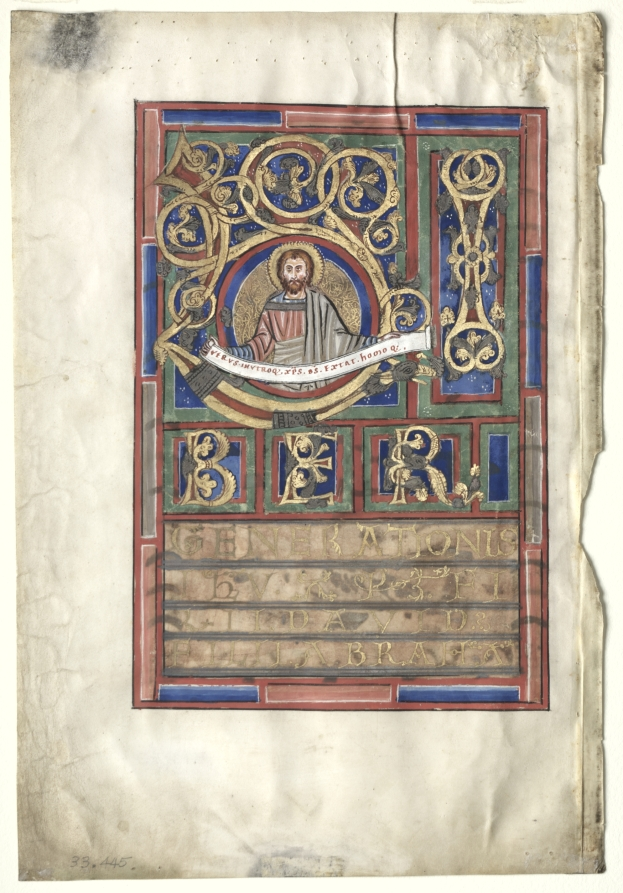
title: Single Leaf Excised from a Gospel Book with Initial L[iber generationis]: St. Matthew (verso)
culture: Germany, Helmarshausen Abbey, 12th century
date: c. 1190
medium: ink, tempera, silver, and gold on vellum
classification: Manuscript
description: This leaf comes from a volume that is preserved in the Trier Cathedral Library in Germany (Codex 142).